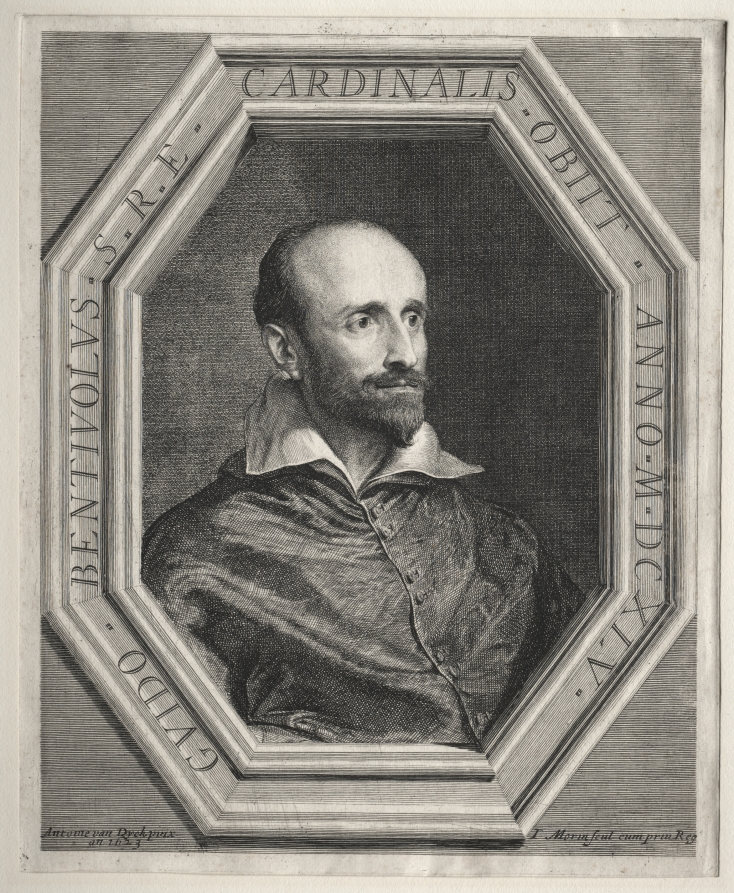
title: Cardinal Guido Bentivoglio, Papal Nuncio at the Court of Louis XIII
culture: France, 17th century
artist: Jean Morin (French, 1600–1650)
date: c. 1614–50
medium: etching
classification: Print